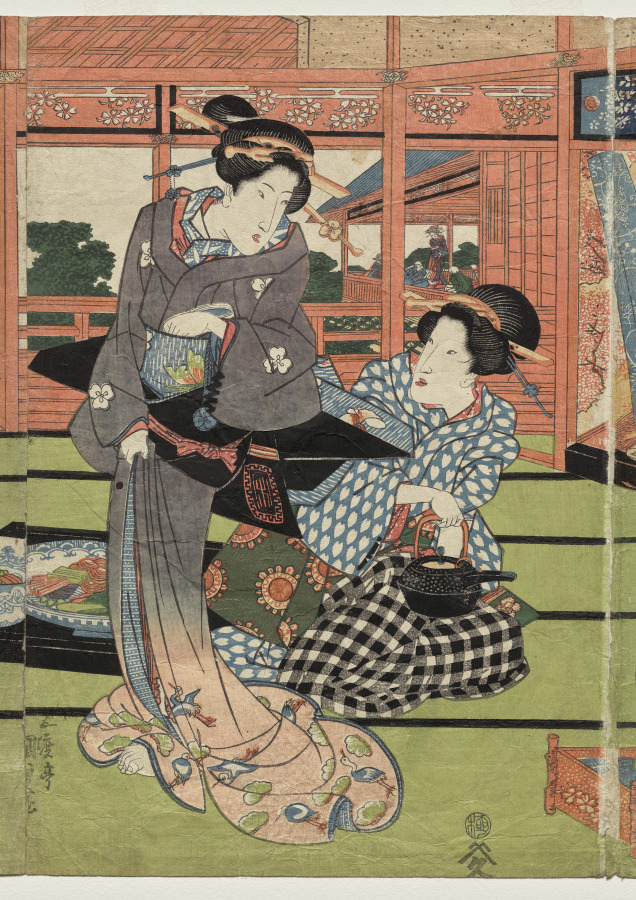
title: A View of the Large New Room at Sakurai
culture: Japan, Edo period (1615–1868)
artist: Utagawa Kunisada (Japanese, 1786–1865)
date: early or mid 1830s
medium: color woodblock print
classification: Print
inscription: Signature: Gototei Kunisada ga Publisher: Yamamotoya Keikichi (emblem) Censorship Seal: kiwame